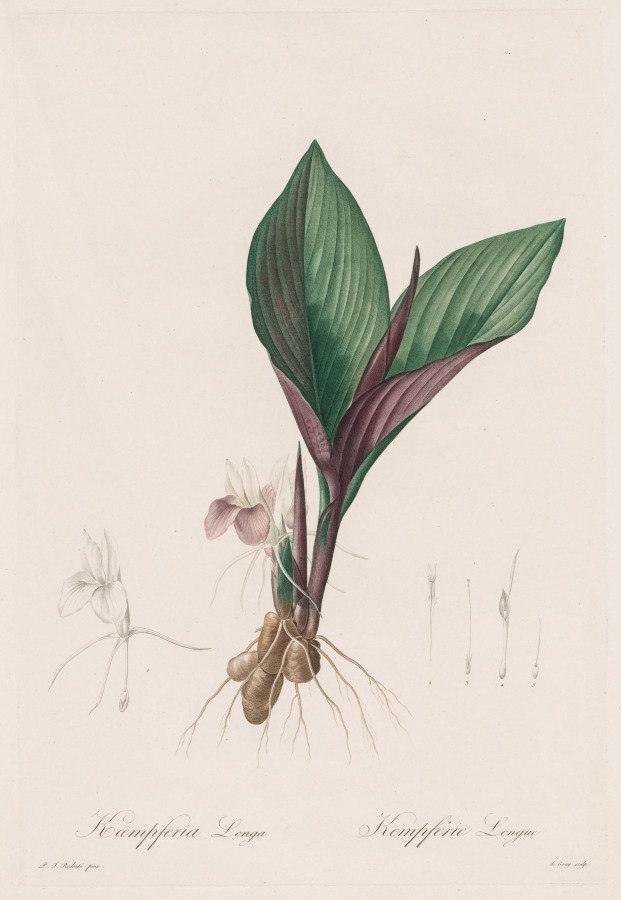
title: Les Liliacées: Kaempferia longa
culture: France, 19th century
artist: Pierre-Joseph Redouté (French, 1759–1840)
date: 1802–1816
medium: stipple and line engraving, with hand coloring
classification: Print